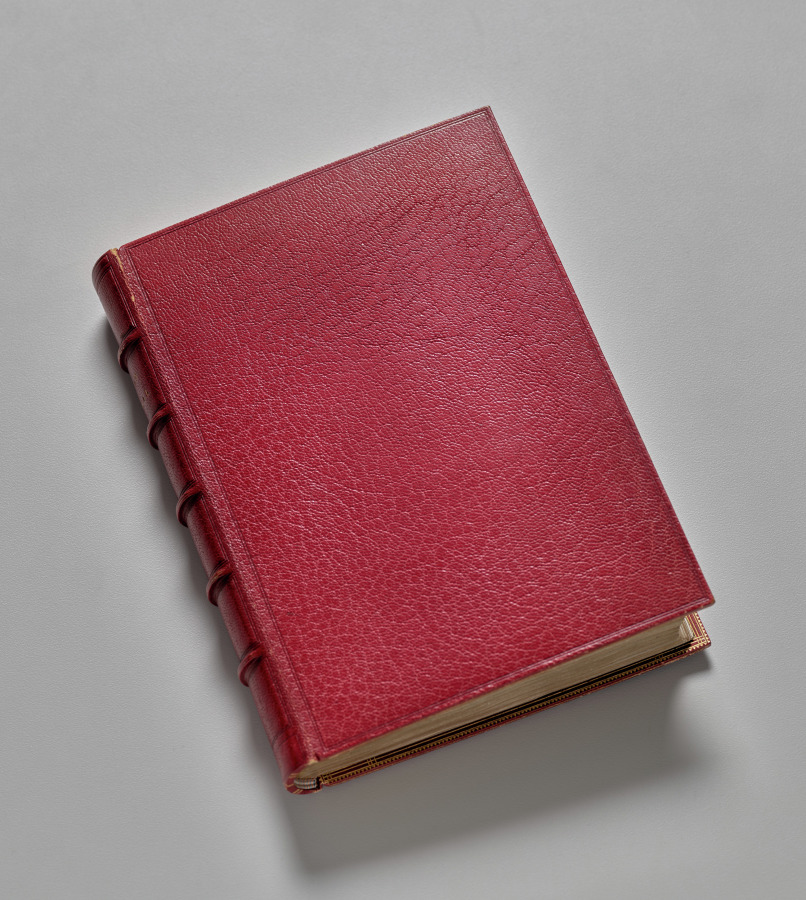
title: Book of Hours (Use of Rouen)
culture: France, Rouen, 15th century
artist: Master of the Geneva Latini (French, active Rouen, 1460–80)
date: c. 1470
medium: ink, tempera, and gold on vellum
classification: Bound Volume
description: In the late 1400s and early 1500s, Rouen, France, was an established and important center of book production. The city’s cathedral had a wealthy chapter that spent large sums of money to commission books and to maintain its extensive library. The stationers (sellers of writing supplies) and booksellers would have likely been concentrated in or near the cathedral precinct. This artist, named after a manuscript now in Geneva, Switzerland, was Rouen’s principal illuminator during the second half of the 1400s. The structure and artistic design are typical for manuscripts of the time.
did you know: Books of hours were often produced as luxury objects in order to reflect the owner’s status, wealth, and taste.